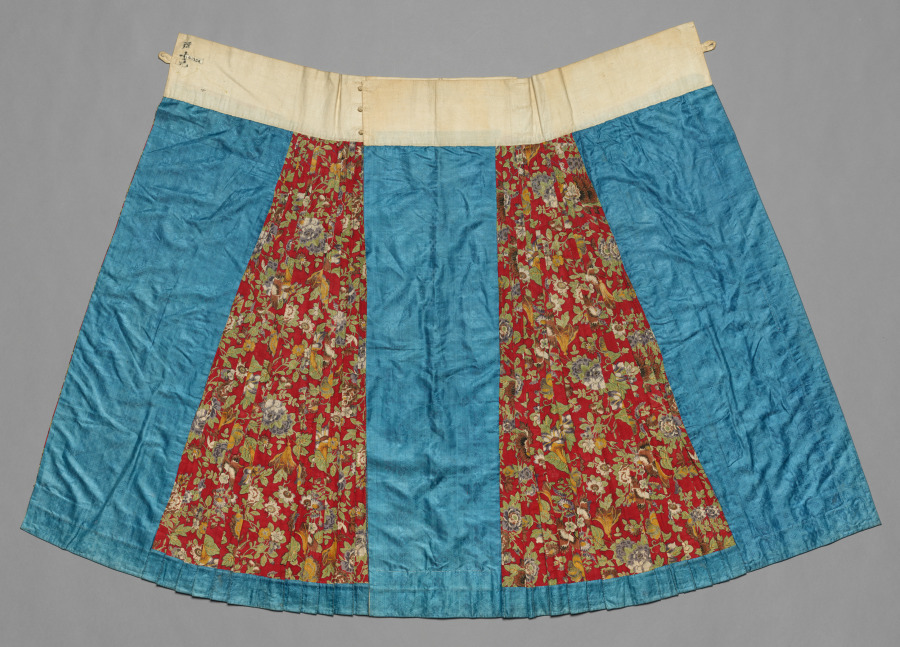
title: Skirt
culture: China, Qing dynasty (1644-1911)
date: 1800s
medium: Silk, cotton: embroidery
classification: Garment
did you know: This skirt includes both embroidered sections and polychrome printed fabric.